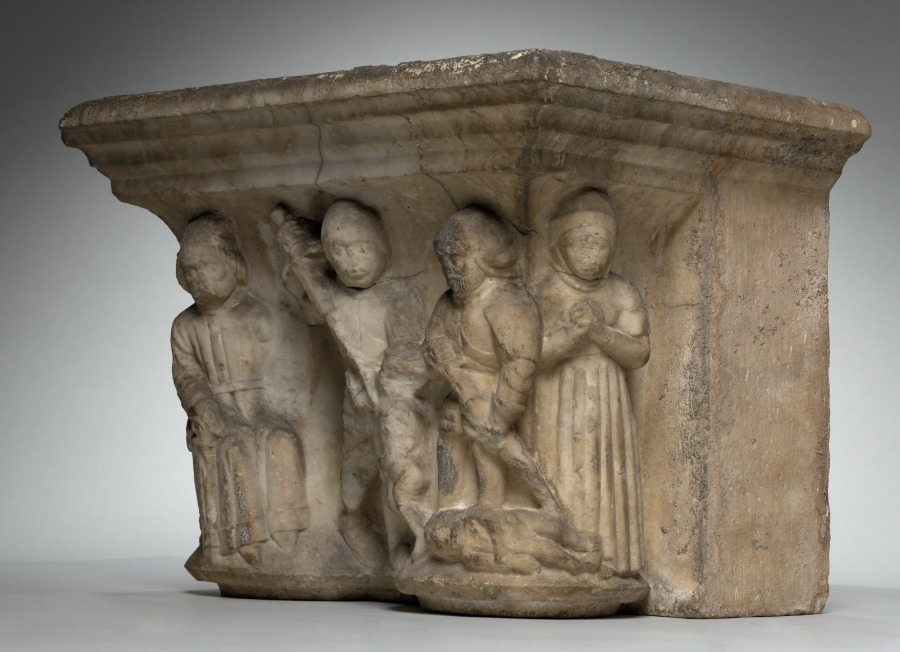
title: Engaged Capital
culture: Southern France, Abbey of Larreule, near Tarbes, 15th century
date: 1400s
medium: limestone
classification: Sculpture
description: This capital belongs to a surviving group including other architectural fragments that once decorated the cloister of the Abbey of Larreule. A cloister was a covered walkway or arcade, usually around all four sides of a square area of grass (the "cloister garth"). The seclusion of the cloister was the monks’ exclusive domain, off limits to others. Here, the monks were supposed to pray, study, meditate, and exercise in privacy and solitude. Such cloister capitals served both to instruct the monks and as a focus for their devotions. Other capitals in this series are installed in the Jardin Massey at Tarbes, near the original abbey. An arch from Larreule has been assembled with other associated French capitals at The Cloisters in New York.